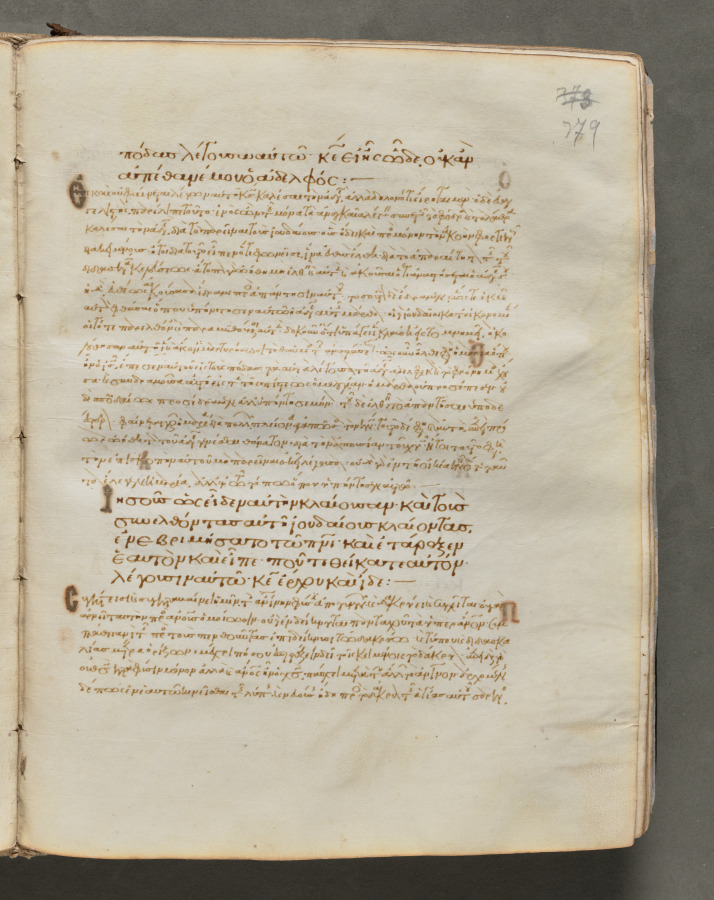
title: Text, folio 379 (recto), from a Gospel Book with Commentaries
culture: Byzantium, Constantinople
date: c. 1000–1100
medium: ink, tempera, and gold on vellum; leather binding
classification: Bound Volume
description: Each of the four gospels in this book opens on a page with brilliantly illuminated borders depicting the author of the text as well as birds—principally peacocks, symbols of the immortality of the soul—and fountains, representing the fountain of life and the salvation of the soul. This volume consists of 428 leaves with texts in Greek. Its level of sophistication suggests that it was probably written and decorated in a monastery in Constantinople.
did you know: Gospel books were carried in procession through Byzantine churches.